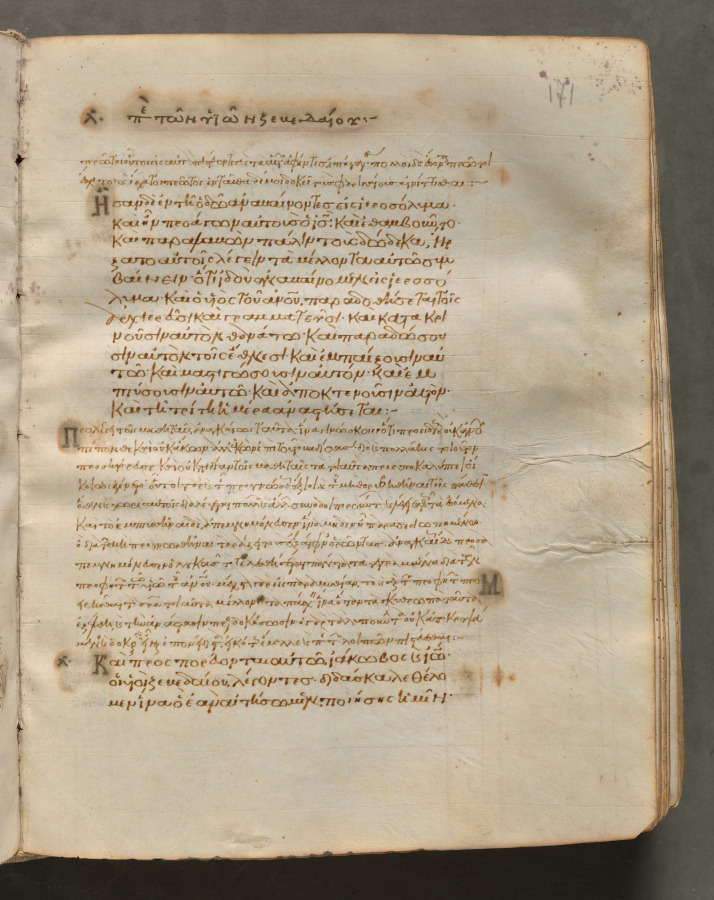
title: Text, folio 171 (recto), from a Gospel Book with Commentaries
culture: Byzantium, Constantinople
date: c. 1000–1100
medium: ink, tempera, and gold on vellum; leather binding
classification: Bound Volume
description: Each of the four gospels in this book opens on a page with brilliantly illuminated borders depicting the author of the text as well as birds-principally peacocks, symbols of the immortality of the soul-and fountains, representing the fountain of life and the salvation of the soul. This volume consists of 428 leaves with texts in Greek. Its level of sophistication suggests that it was probably written and decorated in a monastery in Constantinople.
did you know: Gospel Books were carried in procession through Byzantine churches.